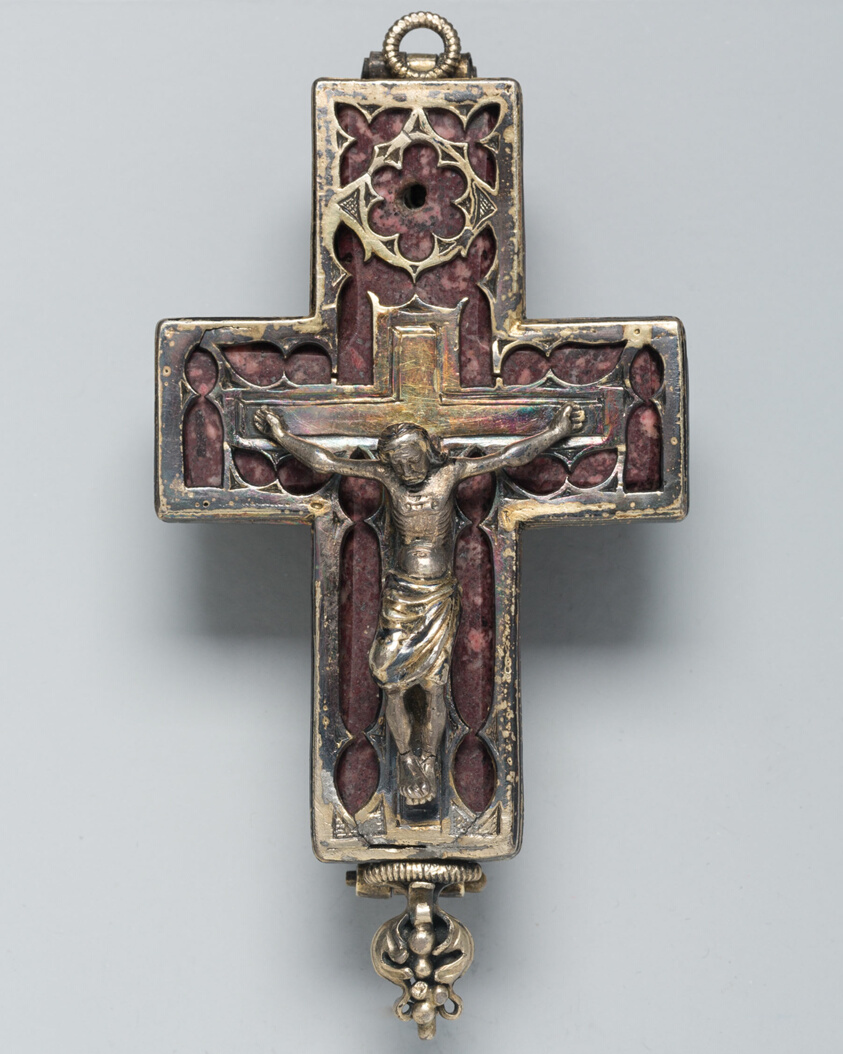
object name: Costume and Accessories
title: Double-Sided Pendant Reliquary Cross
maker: German or Austrian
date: Interior cross: c. 600-c. 900; pendant: c. 1500, with later additions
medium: Silver gilt and porphyry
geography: Germany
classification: pendant (jewelry); jewelry; european decorative arts; costume; ceremonial object; reliquary; religious